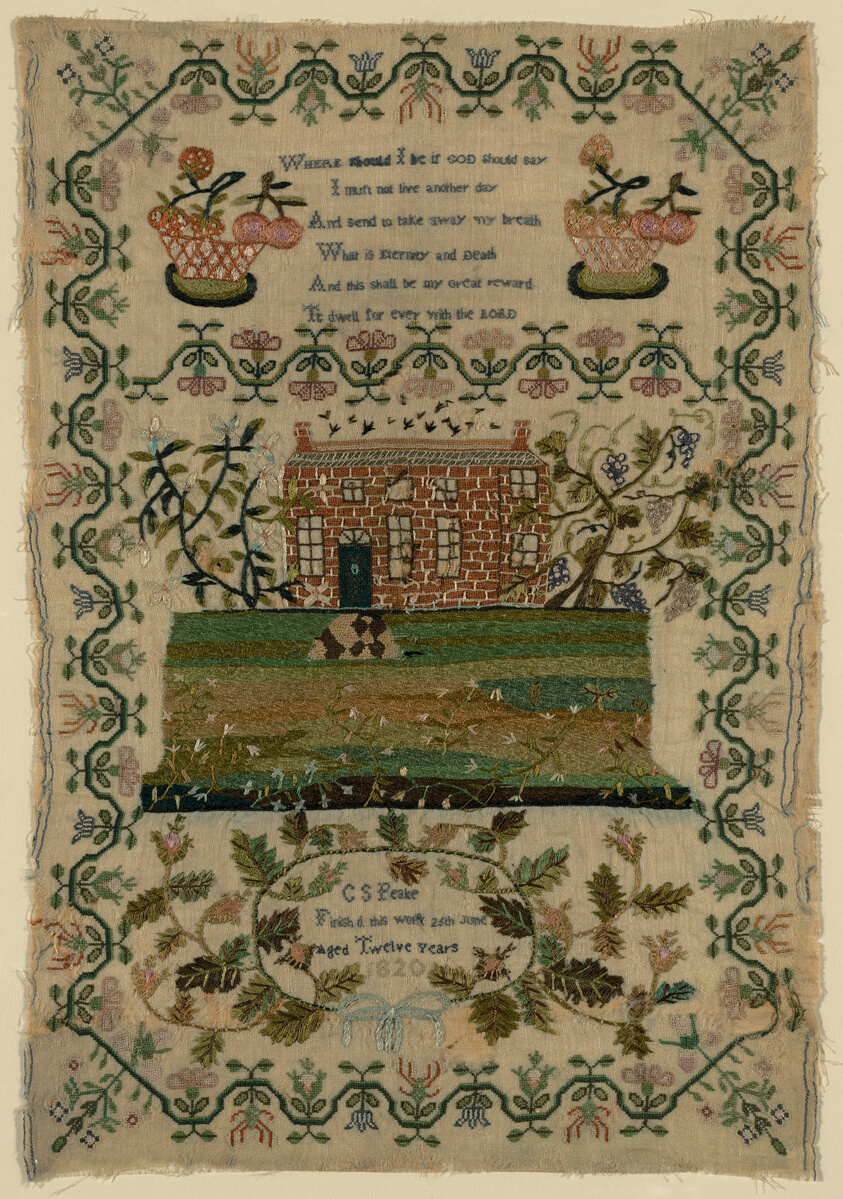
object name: Textile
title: Sampler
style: 19th century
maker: C. S. Peake (born 1807); England or United States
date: 1820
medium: Silk embroidery on wool ground backed with linen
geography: England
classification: sampler; needlework (visual works); textile; embroidery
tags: prayer, bows, floral motifs, flowers, houses, poetry, ribbon